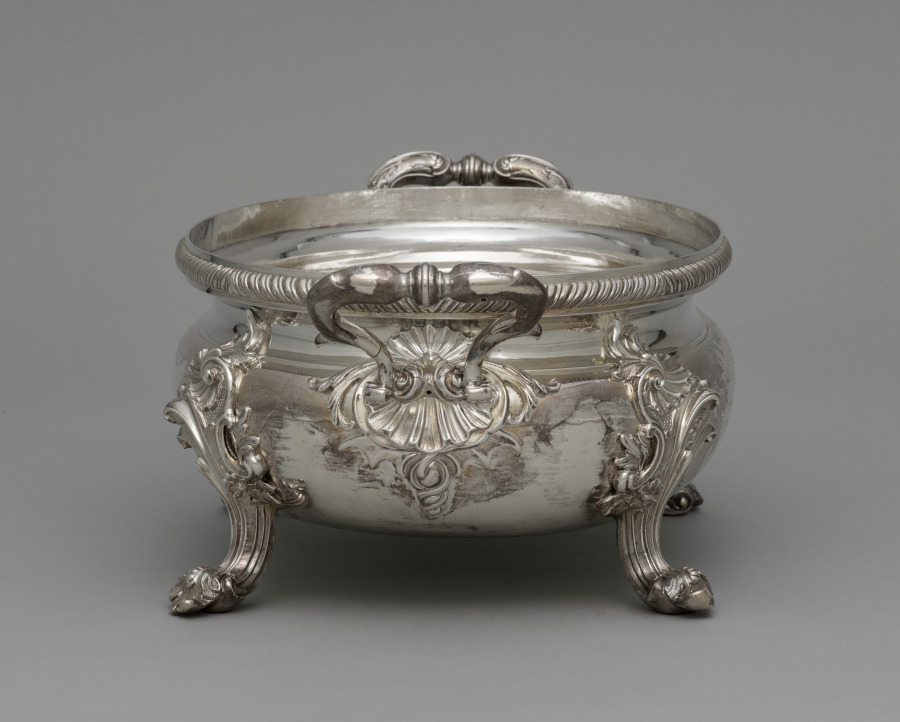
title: Tureen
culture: England, 18th century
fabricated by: Edward Wakelin (British, 1784)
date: 1753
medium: silver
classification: Silver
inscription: engraved coat of arms of Admiral Edward Vernon of Nacton (1684-1757) and his wife Sarah, daughter of Thomas Best. Engraved on cover is Vernon crest, a woman holding a scythe.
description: A very successful silversmith, Edward Wakelin may have been more a businessman than a craftsman or designer.